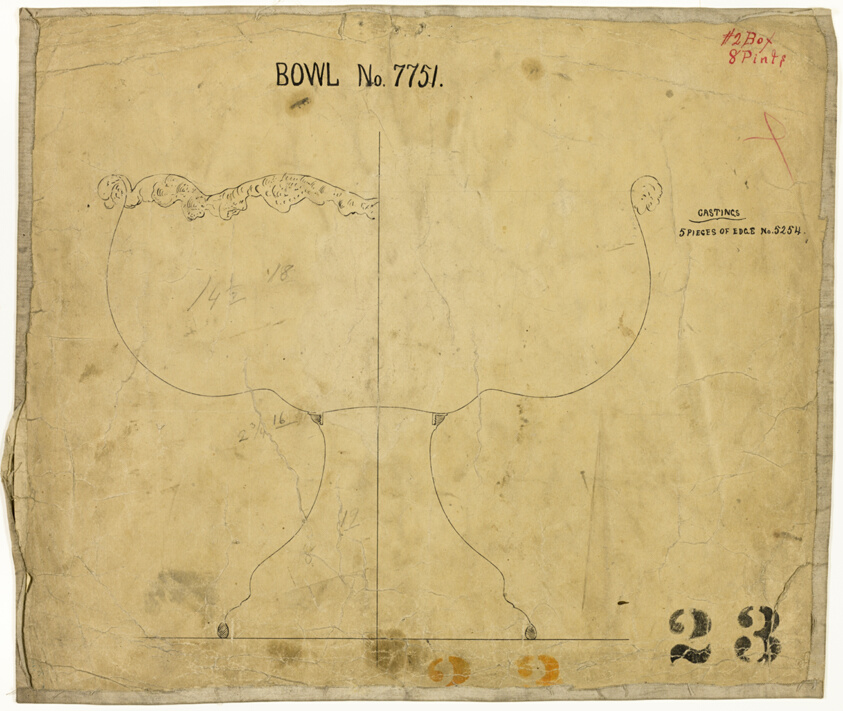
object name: Drawing and Watercolor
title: Design for Bowl No. 7751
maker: Tiffany and Company (American, founded 1837)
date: 1883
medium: Black ink on tan wove paper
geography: United States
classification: prints and drawing; paper